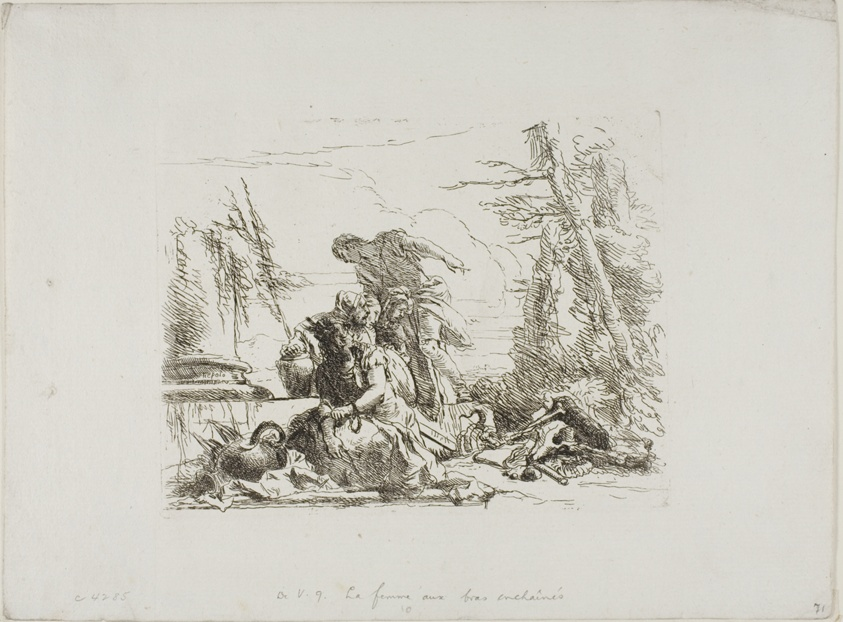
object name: Print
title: A Woman with her Arms in Chains and Four Other Figures, from Capricci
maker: Giovanni Battista Tiepolo (Italian, 1696–1770)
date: 1740/50, published 1785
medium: Etching on paper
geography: Italy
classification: etching; print; prints and drawing